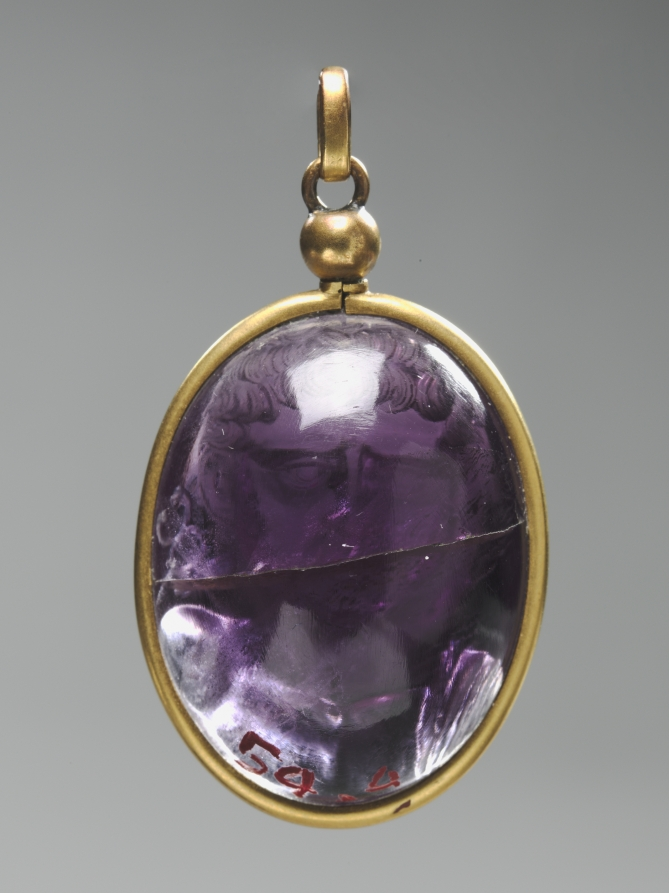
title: Intaglio with Male Portrait Bust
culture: Byzantium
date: 500s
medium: amethyst with gold mount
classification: Glyptic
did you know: While the identity of this man is unknown, his portrait, carved into this gem, preserves his likeness. His family may have commissioned this artwork to remember him by. Do you have any keepsakes that remind you of family members?